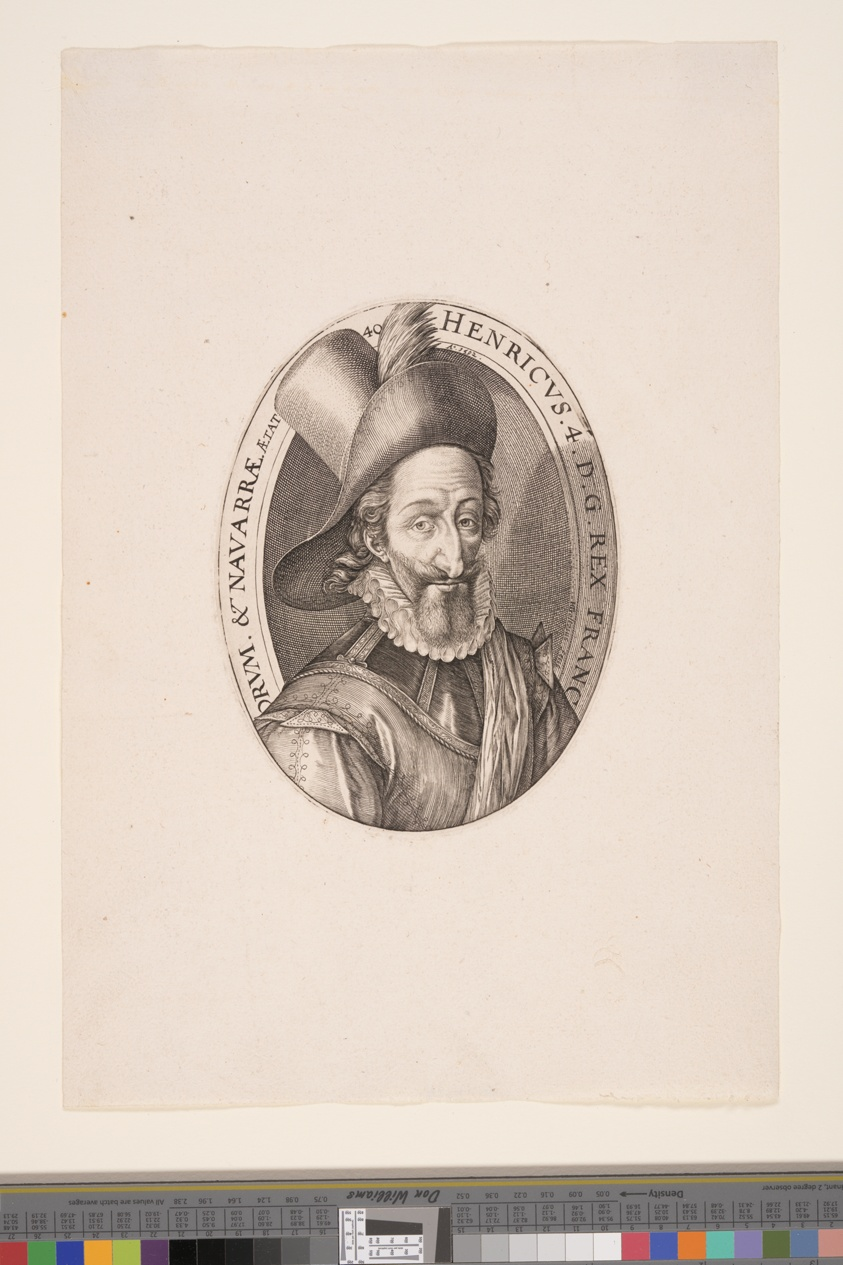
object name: Print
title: Henry IV, King of France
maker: Hendrick Goltzius (Dutch, 1558–1617)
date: 1592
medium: Engraving on laid paper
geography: Netherlands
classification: engraving; paper; print; prints and drawing